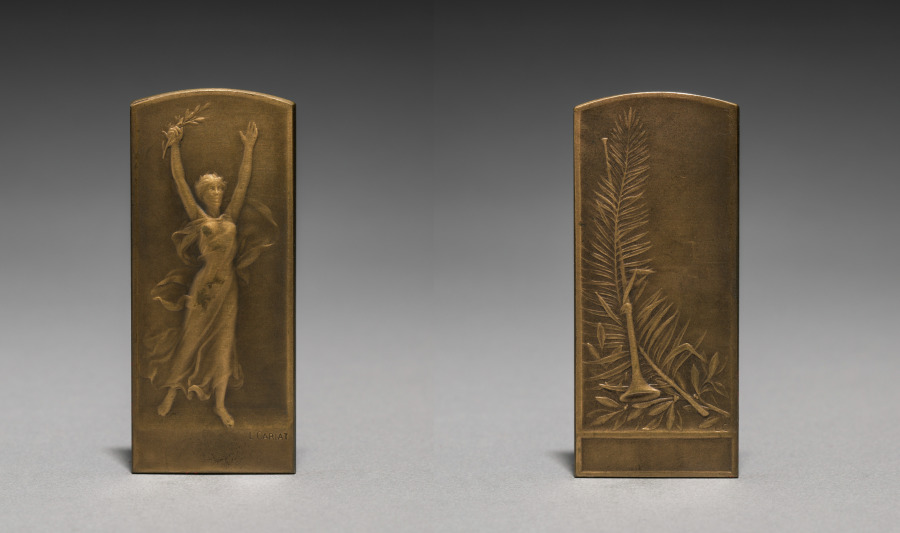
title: Medal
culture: France, 19th century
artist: Lucien Julien Henri Cariat (French)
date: c. 1900–1925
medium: bronze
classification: Metalwork